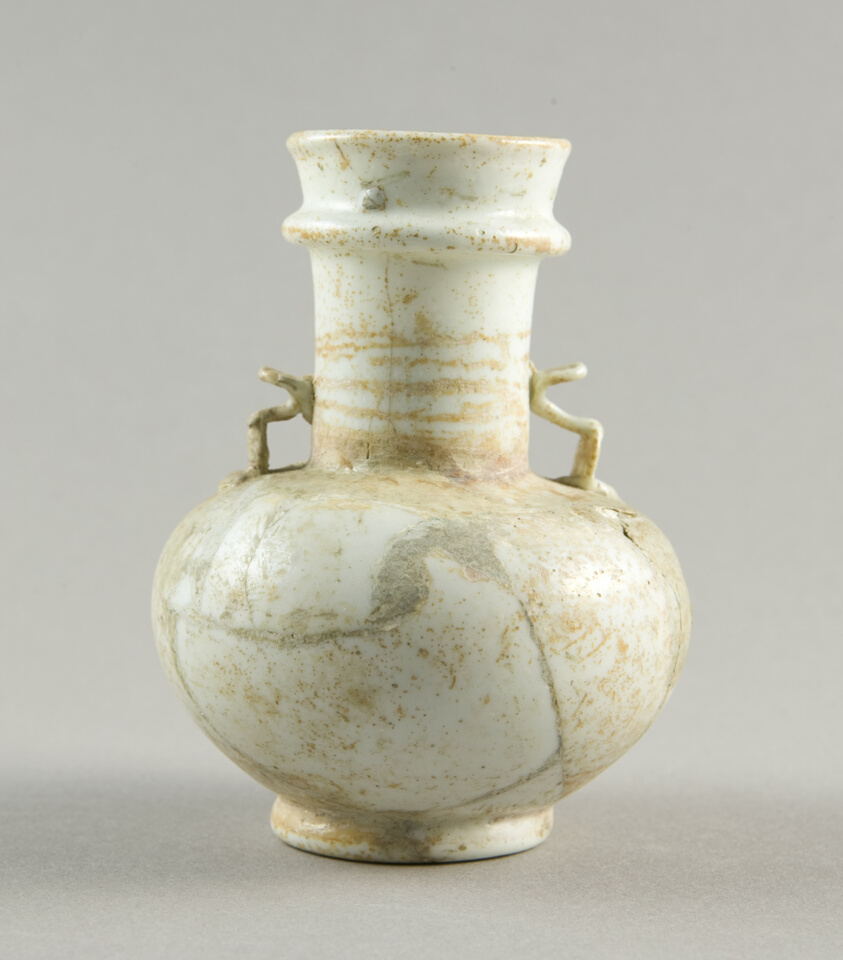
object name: Vessel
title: Bottle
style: ancient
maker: Ancient Mediterranean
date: 9th-11th century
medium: Glass, blown technique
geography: Mediterranean Region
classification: glass; vessel; ancient art